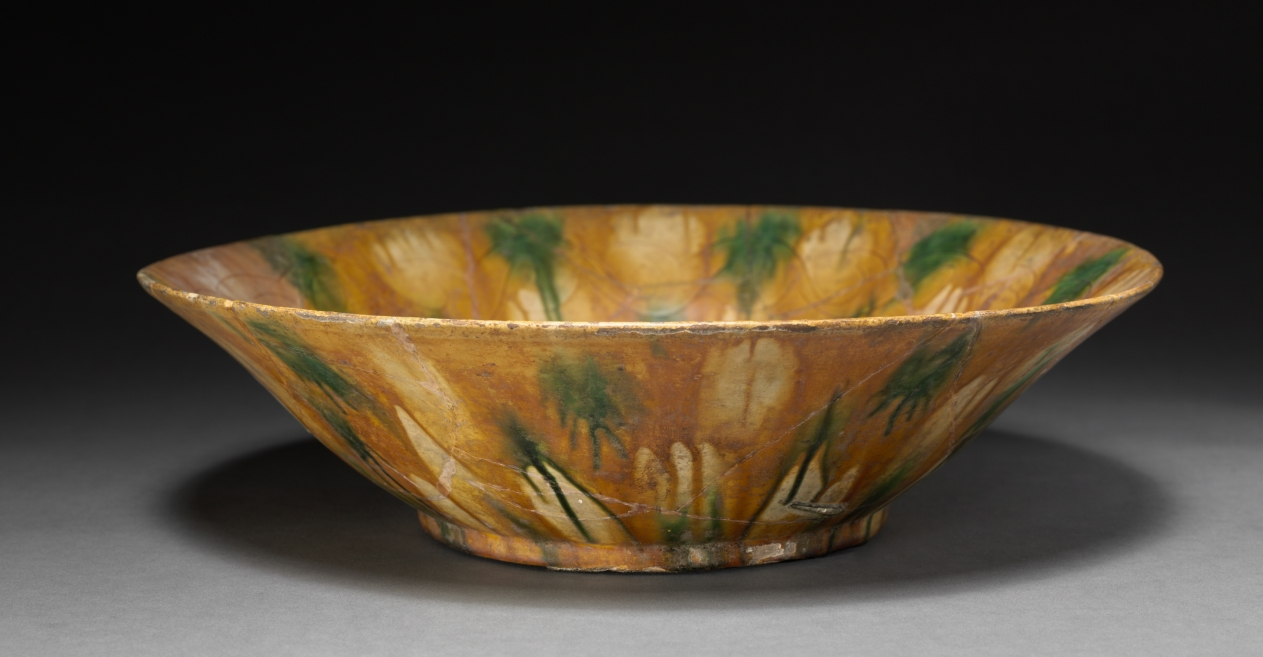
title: Bowl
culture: Iraq or Iran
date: 800s–900s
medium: earthenware with painted underglaze and incised design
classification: Ceramic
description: This large bowl with flaring sides is splashed with yellow, brown, and green pigments, which have run during the firing process, in imitation of Tang Chinese ceramics.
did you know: Look closely: the bowl has incised decoration of a large palmette in the center and a split-leaf scroll pattern just inside the rim.